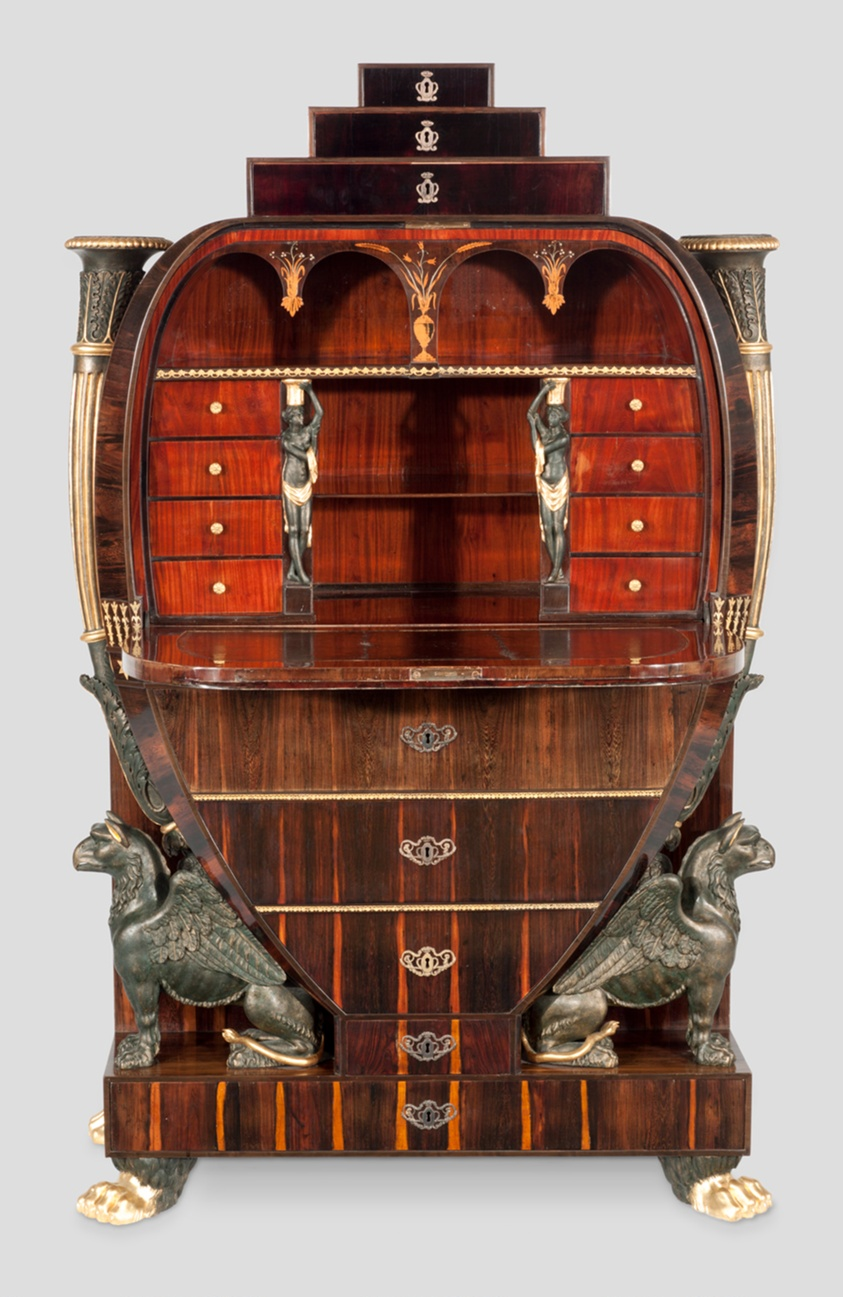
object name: Furniture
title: Fall-Front Desk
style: biedermeier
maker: Vienna, Austria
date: c. 1810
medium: Various woods and gilt-bronze mounts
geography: Vienna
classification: furniture; desk; european decorative arts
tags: furniture